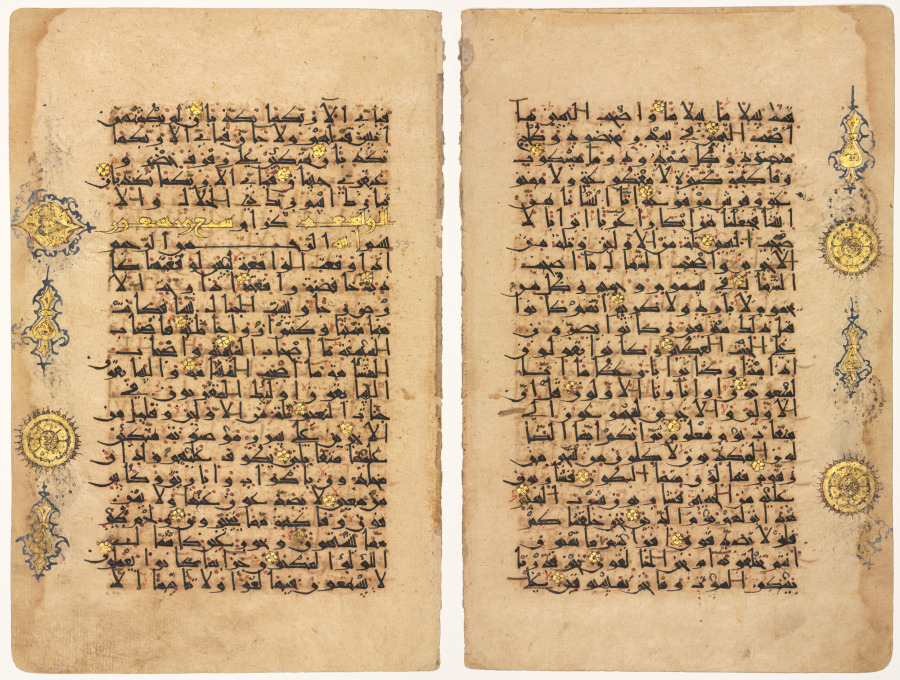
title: Folio from a Qur'an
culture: Iran, Seljuq period (1037–1194)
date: 1100s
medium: ink, gold, and colors on paper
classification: Calligraphy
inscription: Recto: Sura al-Rahman (55: 73–78 end) and Sura al-Waqi'ah (56: 1–part 26). Verso: Sura al-Waqi'ah (56: part 26–part 61).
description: East Persian ornamental Kufic (a script used for Qur’an transcriptions) in black, red, and gold fill this page, which is additionally decorated with gold and blue medallions on its border. Twenty-three lines from the Qur’an’s Surah al-Waqi'ah (The Event, or Day of Resurrection; 56: 1–26) are on the recto and 23 lines from Surah al-Rahman (The Compassionate, 55: 73–78) are on the verso.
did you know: Kufic script was named after the ancient Mesopotamian city Kufa (in today’s Iraq), where it developed.